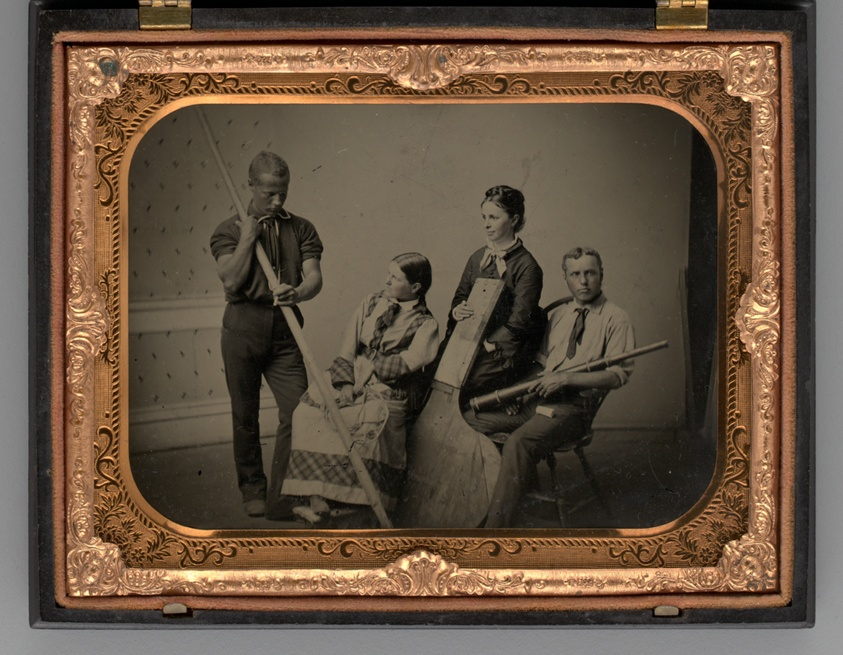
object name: Photograph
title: Untitled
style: 19th century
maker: Unknown maker; American, 19th century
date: 1865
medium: Tintype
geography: United States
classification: portrait; photograph; photographic process; photography; portrait; tintype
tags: lundberg collection, portraits